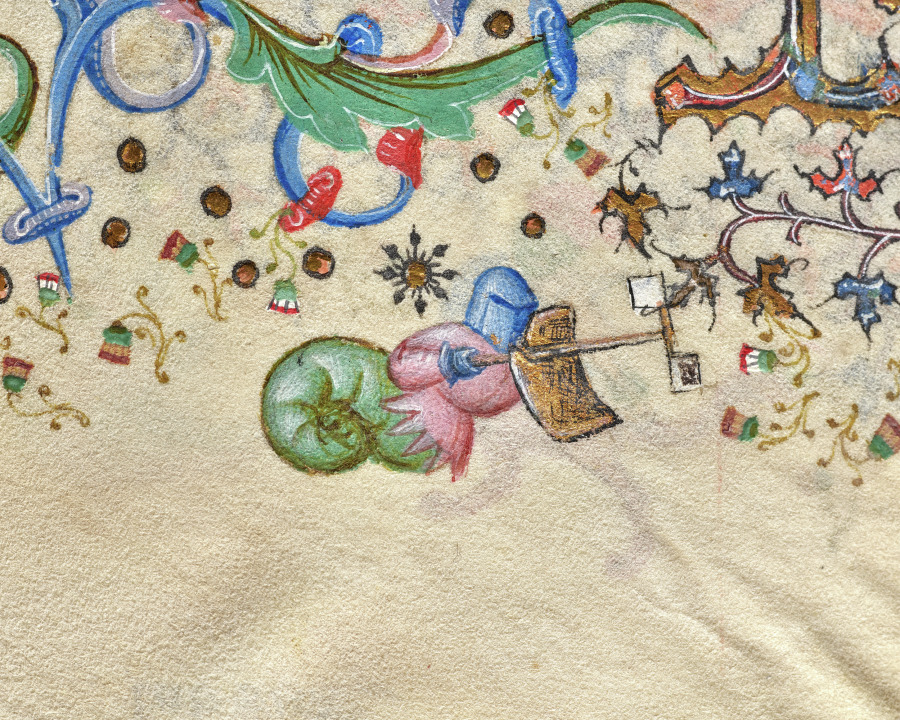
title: Hours of Charles the Noble, King of Navarre (1361-1425): fol. 282r, St. Thomas à Becket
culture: France, Paris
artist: Master of the Brussels Initials and Associates (French)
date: c. 1405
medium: ink, tempera, and gold on vellum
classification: Bound Volume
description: This precious volume was obviously highly prized by its owner, the French-born King of Navarre, who had his coat of arms painted on no less than twenty folios. Rather than directly commissioning this manuscript from a specific workshop, it seems that Charles the Noble acquired his book of hours -- perhaps ready-made for the luxury market -- while on a trip to Paris in 1404-05. A collaborative effort, six painting styles are evidenced within the pages of this codex, those of two Italians, two Frenchmen, and two Netherlanders. The painter who was responsible for the planning and decoration of the book, and who produced seventeen of the large miniatures, was a Bolognese artist known as the Master of the Brussels Initials. His principal assistant, responsible for most of the borders, was a Florentine who signed his name "Zecho" da Firenze on folio 208 verso.